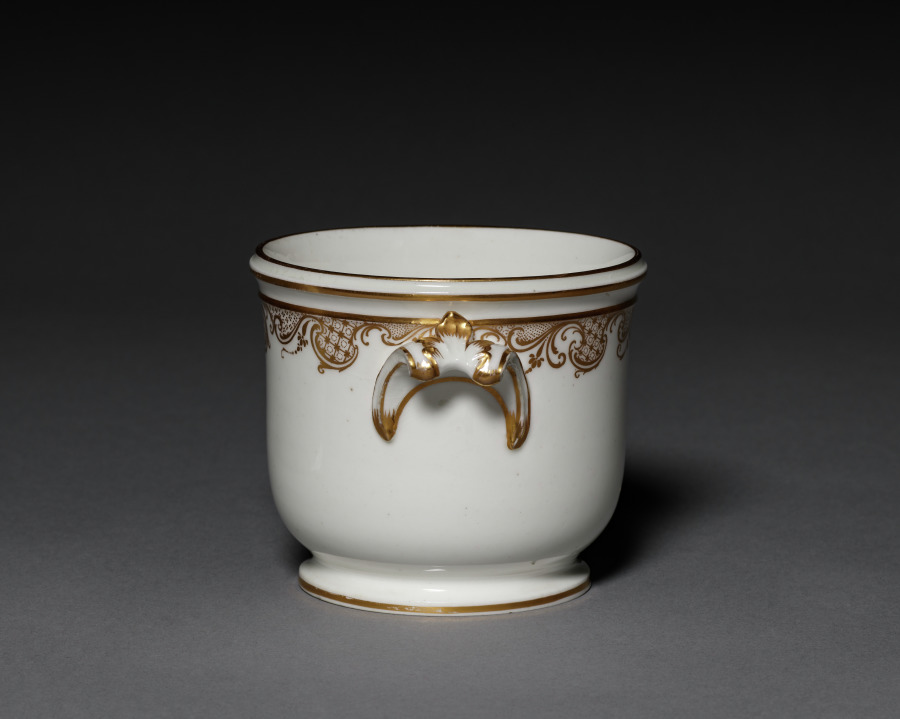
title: Flower Pot (2 of 2)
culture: France, Vincennes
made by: Vincennes Porcelain Factory (France, 1740–56)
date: 1745–53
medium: soft-paste porcelain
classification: Ceramic